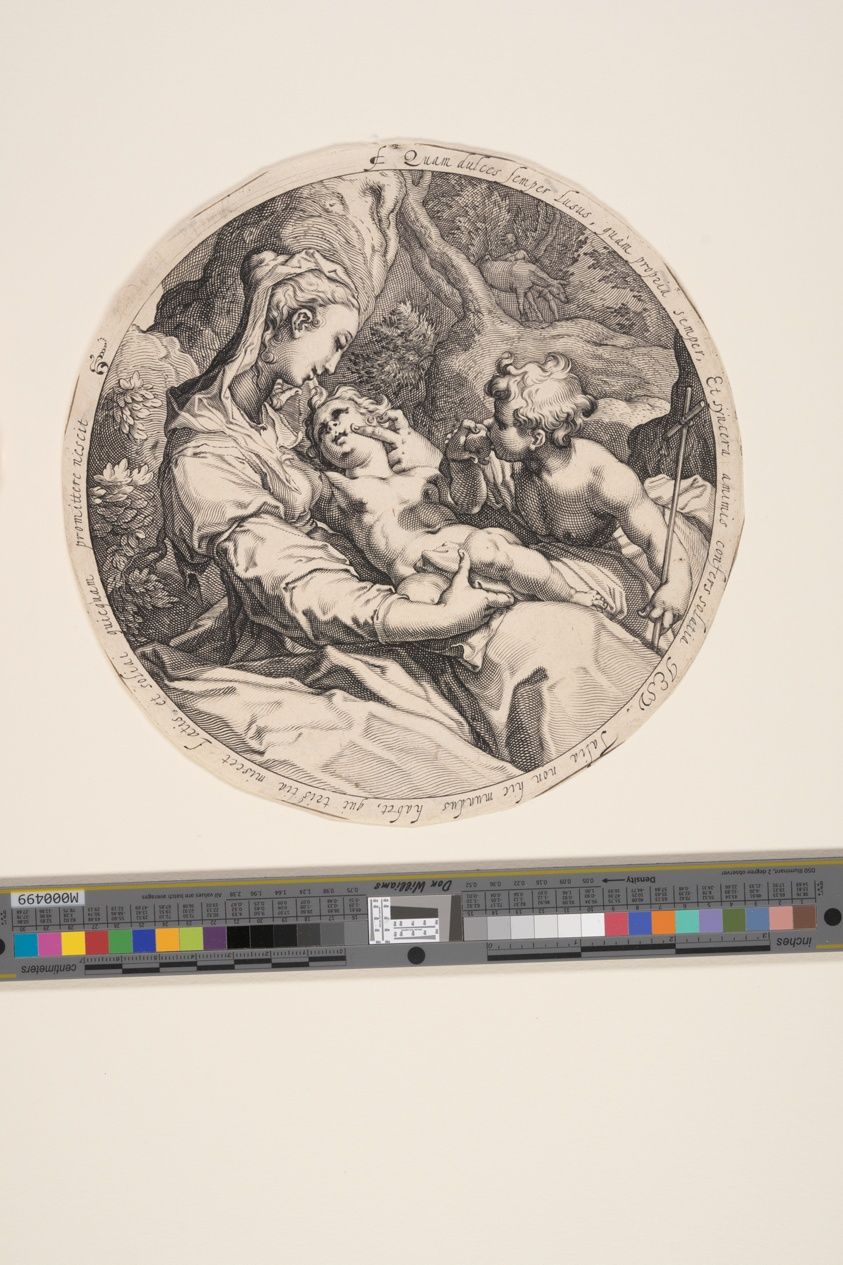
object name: Print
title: Virgin and Child with St. John the Baptist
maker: Jacques de Gheyn II (Dutch, 1565–1629) or workshop; after Abraham Bloemaert (Dutch, 1566–1651)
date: c. 1595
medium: Engraving on laid paper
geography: Netherlands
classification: engraving; paper; print; prints and drawing